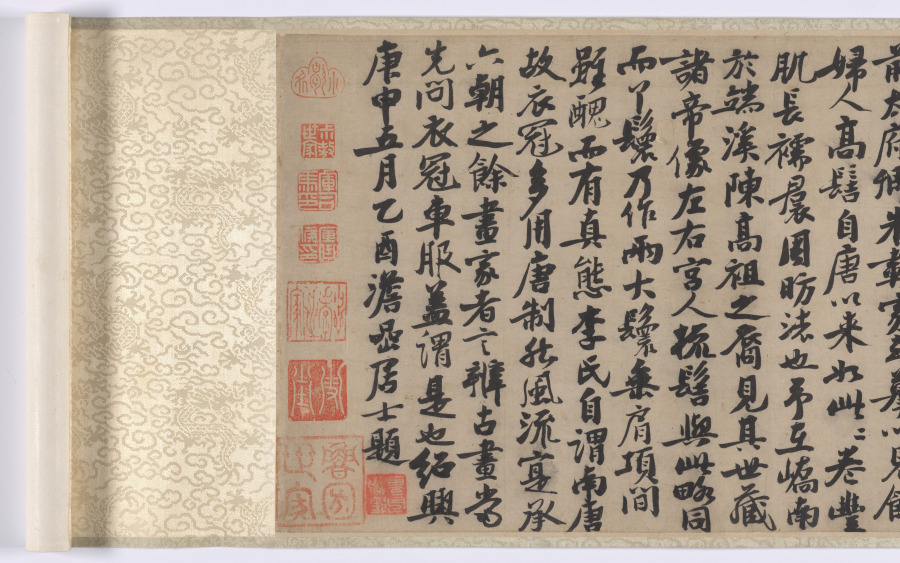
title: In the Palace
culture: China, Southern Song dynasty (1127-1279)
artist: after a work attributed to Zhou Wenju (Chinese, active 942–961)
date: before 1140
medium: Handscroll; ink and light color on silk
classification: Painting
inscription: 1 colophon and 13 seals: 1 colophon and 1 seal of Zheng Cheng 張澂 (d. 1143); 12 seals unidentified.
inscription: Colophon by Zhang Cheng 張澂 (d. 1143): 周文矩宮中圖婦人小兒其數八十，一男子寫神，而粧具、樂器、盆盂、扇椅席、鸚鵡、犬蝶不與。文矩句容人，為江南翰林待詔。作士女體近周昉，而加纖麗。嘗為後主畫南莊圖，號一時絕筆。它日上之朝廷，詔籍之祕閣。宮中圖云是真蹟，藏前太府卿朱載家。或摹以見餽。婦人高髻自唐以來如此。此卷豐肌長襦裙，周昉法也。予至嶠南，於端溪陳高祖之裔，見其世藏諸帝像，左右宮人梳髻與此畧同。而丫鬟乃作兩大鬟，垂 肩項間，雖醜而有真態。李氏自謂南唐，故衣冠多用唐制，然風流寔承六朝之餘。畫家者言辨古畫當先問衣冠車服，蓋謂是也。紹興庚申五月乙酉澹嵒居士題。 印：張澂印章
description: In the Palace depicts 13 ladies of the imperial household, three servants, and six children in fluent baimiao (plain drawing) brushwork, accentuated by color. The women entertain themselves by making music, tending children, and playing with pets. Their elaborate hairstyles, plump figures, and flowing robes are reminiscent of Tang dynasty fashion. The scroll illustrates elegant court life and is a direct copy of the original by Zhou Wenju (active 940–75) from Zhenjiang, Jiangsu province. Zhou was employed at the Southern Tang court in Nanjing under Emperor Li Yu (reigned 961–76), a prolific poet.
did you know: The ladies' elaborate hairstyles, plump figures, and flowing robes are reminiscent of Tang dynasty fashion.